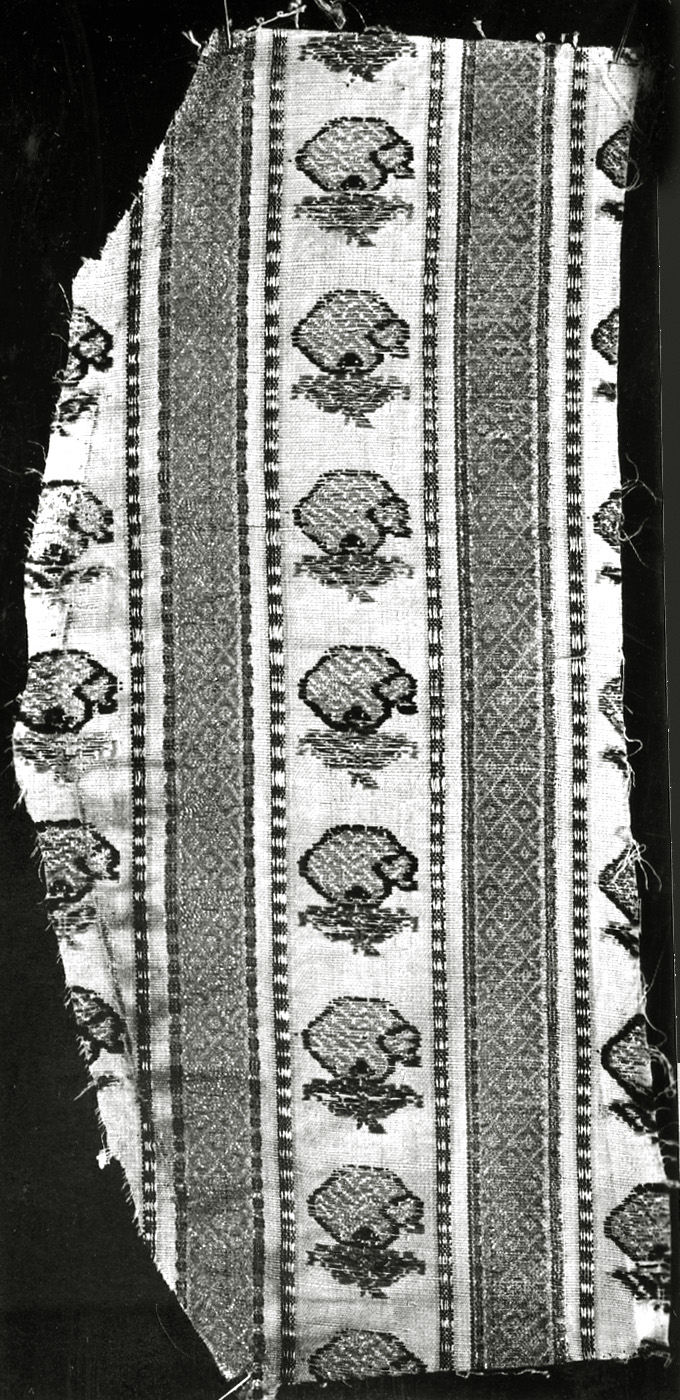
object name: Textile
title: Fragment (Dress Fabric)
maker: Turkey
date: 19th century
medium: Brocaded plain compound cloth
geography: Turkey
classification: textile; weaving